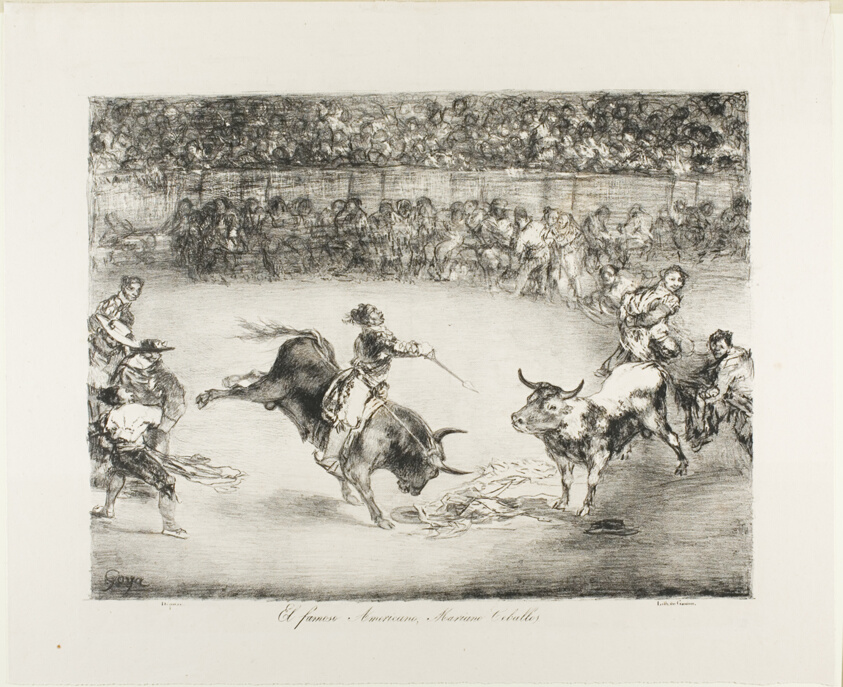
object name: Print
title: The Famous American, Mariano Ceballos, from The Bulls of Bordeaux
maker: Francisco José de Goya y Lucientes (Spanish, 1746-1828)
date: 1825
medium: Lithographic crayon and scraper on ivory wove paper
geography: Spain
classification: lithograph; print; prints and drawing